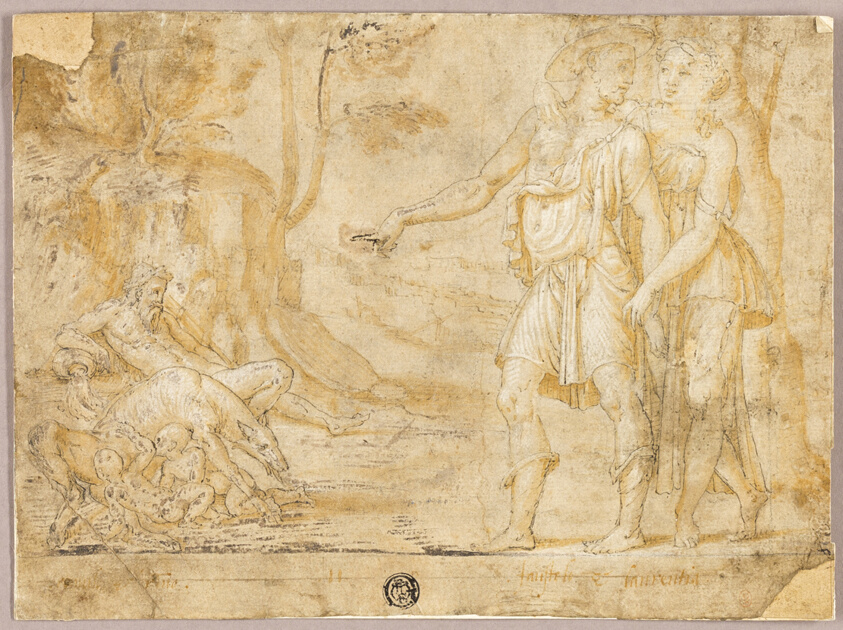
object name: Drawing and Watercolor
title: Faustulus and Merentia Discover Romulus and Remus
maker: Possibly school of Fontainebleau (French, 16th century); or an unknown Netherlandish artist (16th century)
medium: Pen and black ink and brush and pale orange wash, heightened with lead white (discolored), on tan laid paper, laid down on cream laid paper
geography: France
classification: pen and ink drawings; drawings (visual works); prints and drawing